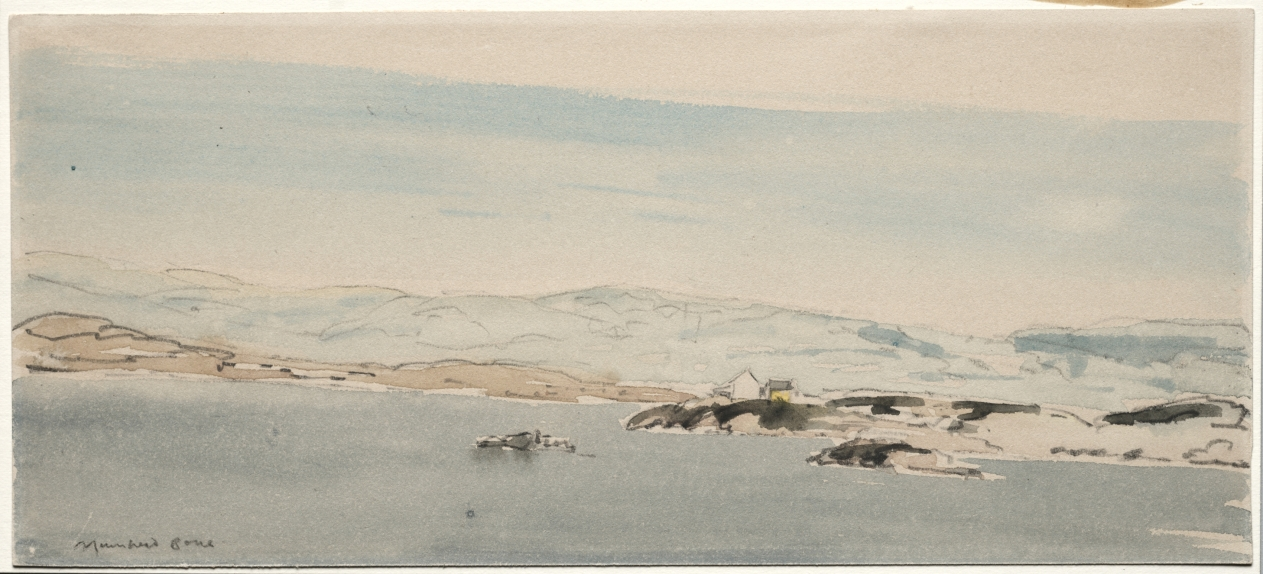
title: Entering Bergen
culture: England, 20th century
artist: Muirhead Bone (British, 1876–1953)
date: c. 1896–1953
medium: watercolor and graphite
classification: Drawing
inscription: Lower right, in graphite: Muirhead Bone